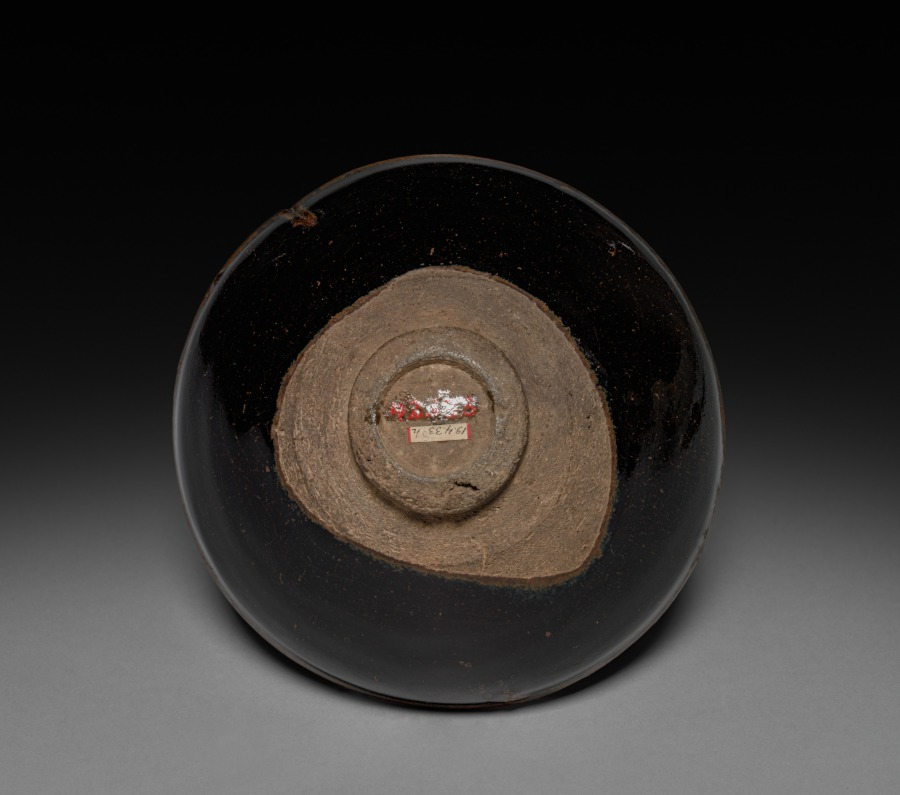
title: Tea Bowl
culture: China, near Shui ch'i, Song dynasty (960-1279)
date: 960–1279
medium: Stoneware, Jian ware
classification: Ceramic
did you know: Jian ware was very popular with the tea cultures in China and Japan.